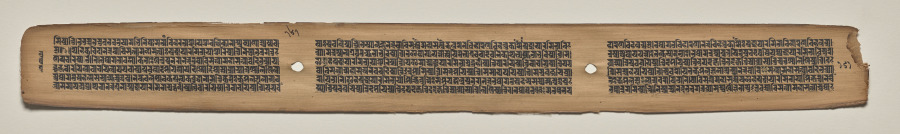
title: Text, folio 161 (verso), from a Manuscript of the Perfection of Wisdom in Eight Thousand Lines (Ashtasahasrika Prajnaparamita-sutra)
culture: Eastern India, Bihar, Vikramashila Monastery. Painting: Nepal, Kathmandu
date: Sunday, September 14, 1119 (year 239 of the Newar Samvat in the month of Ashvina)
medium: gum tempera and ink on palm leaves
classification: Painting